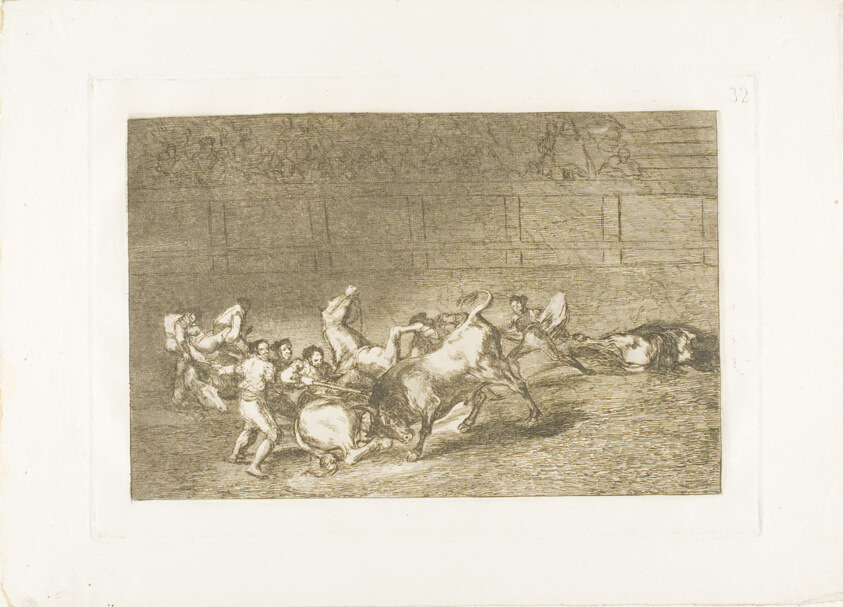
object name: Print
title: Two teams of picadors thrown one after the other by a single bull, plate 32 from The Art of Bullfighting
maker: Francisco José de Goya y Lucientes (Spanish, 1746-1828)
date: 1814/16, published 1816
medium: Etching, burnished aquatint, drypoint and burin on ivory laid paper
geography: Spain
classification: etching; print; prints and drawing